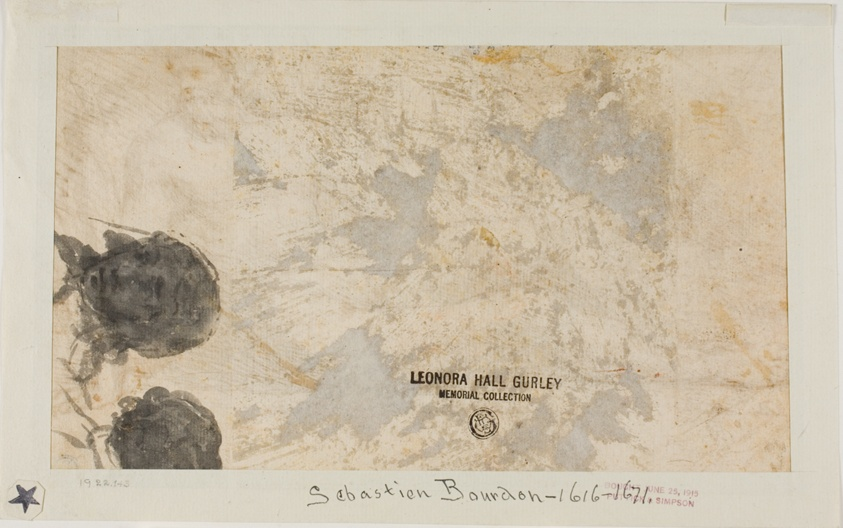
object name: Drawing and Watercolor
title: River God (recto); Sketches of Two Male Heads (verso)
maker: Recto attributed to Sébastien Bourdon (French, 1616-1671); Verso by Unknown Artist (French, 17th century)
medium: Pen and brown ink over red chalk (recto) and brush and black ink (verso) on ivory laid paper, edge mounted on off-white laid paper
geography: France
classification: drawings (visual works); prints and drawing